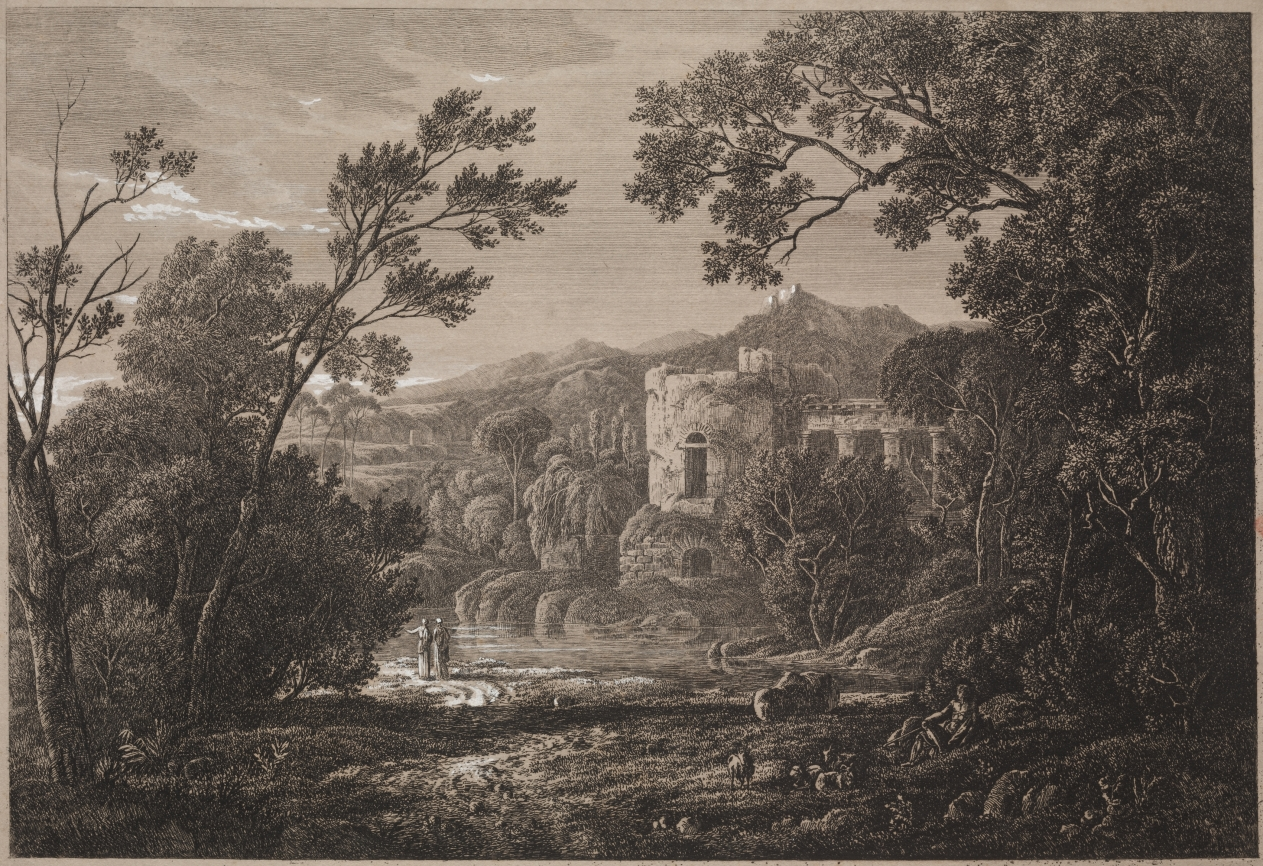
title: An Italian View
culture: Austria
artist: Joseph Rebell (Austrian, 1787–1828)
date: c. 1810?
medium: etching heightened with white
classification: Print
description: Rebell’s early work, such as this Italian view, had strong overtones of classicism and was influenced by Claude Lorrain’s heroic depictions of the landscape. Rebell spent long periods in Italy, first visiting Milan in 1810, Naples in 1813, and Rome in 1816. More active as a painter, he made a small number of prints. This evocative etching printed on brown paper and enlivened with white heightening reveals his painterly inclinations.